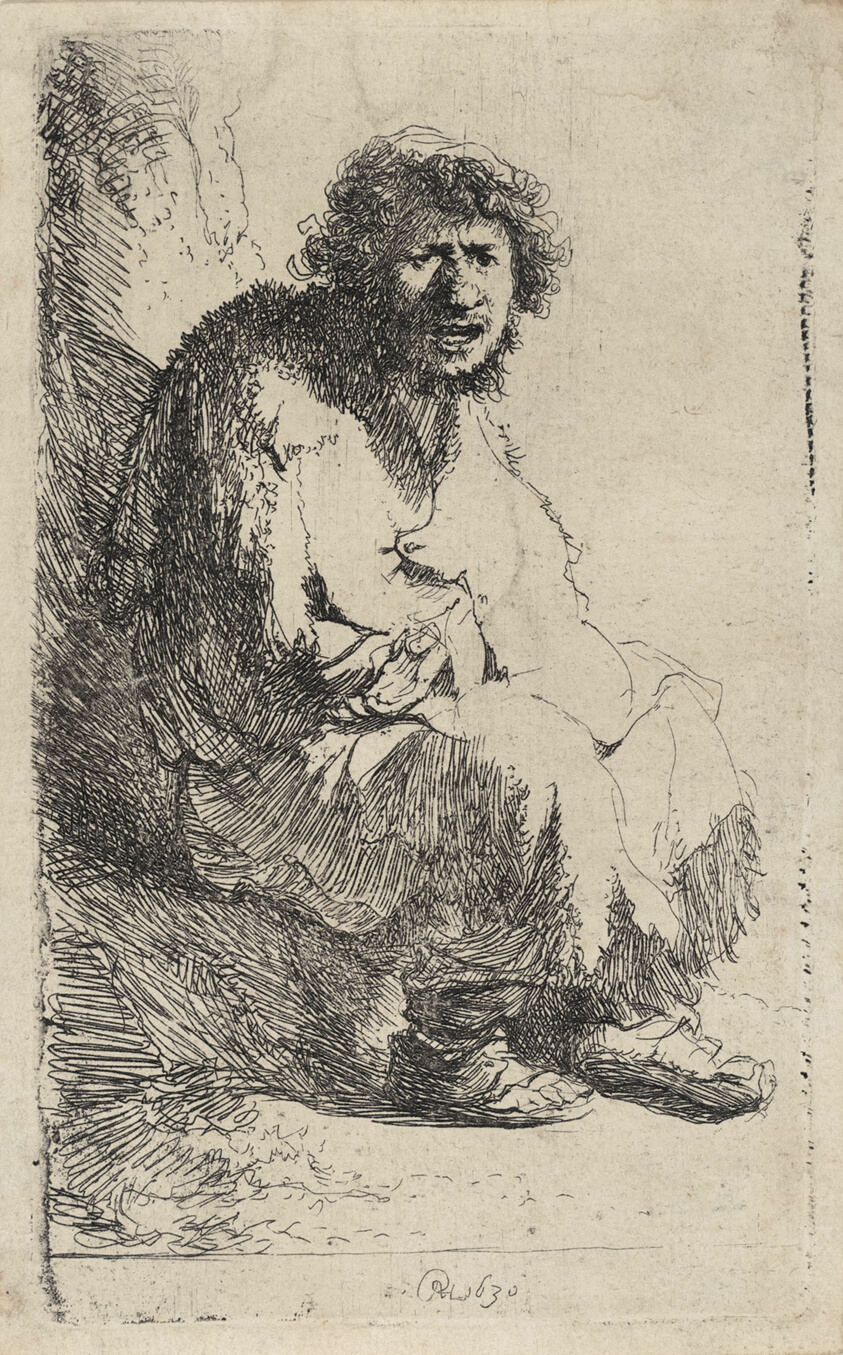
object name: Print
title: Beggar Seated on a Bank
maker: Rembrandt van Rijn (Dutch, 1606-1669)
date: 1630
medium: Etching on ivory laid paper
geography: Holland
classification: etching; print; prints and drawing; paper